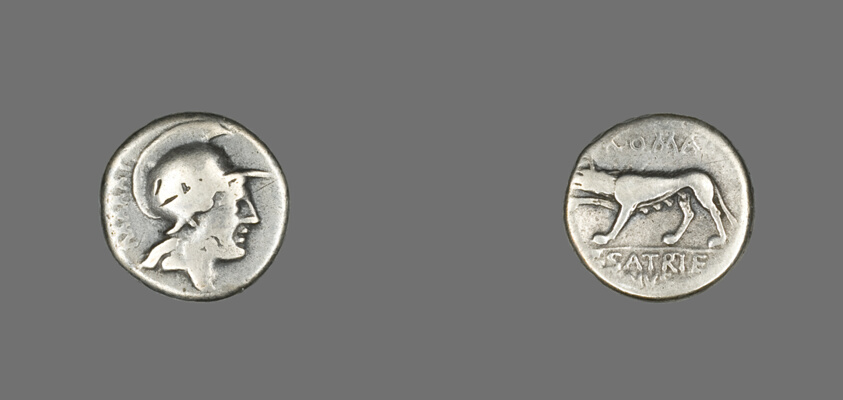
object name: Coin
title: Coin Depicting the Goddess Roma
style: roman (ancient, style or period)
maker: Roman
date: 77 BCE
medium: Silver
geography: Italy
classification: coin; ancient art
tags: goddesses